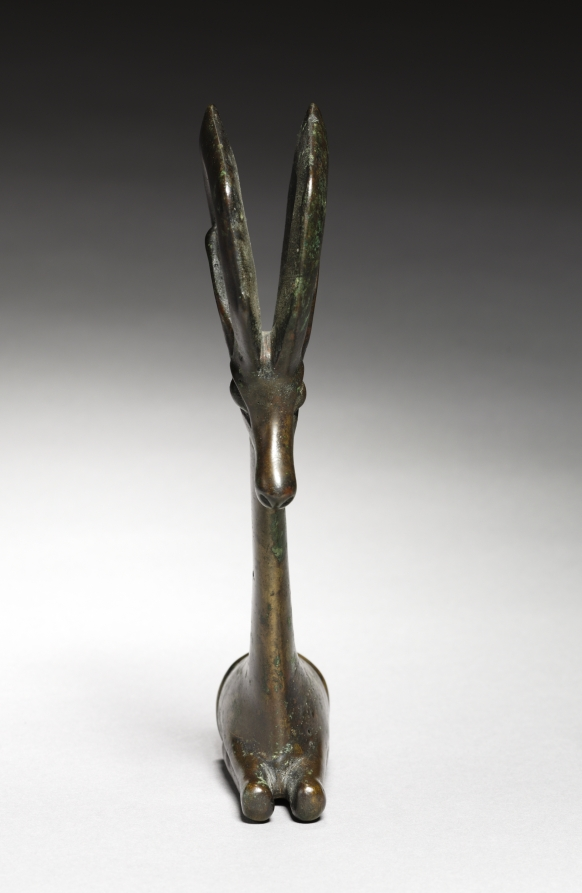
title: Ibex Whetstone Handle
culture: Iran, Luristan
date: 1100–900 BCE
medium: bronze, cast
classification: Sculpture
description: For millennia, whetstones have been used for sharpening various kinds of metal blades. They were particularly important in Luristan, a center that produced bronze blades.